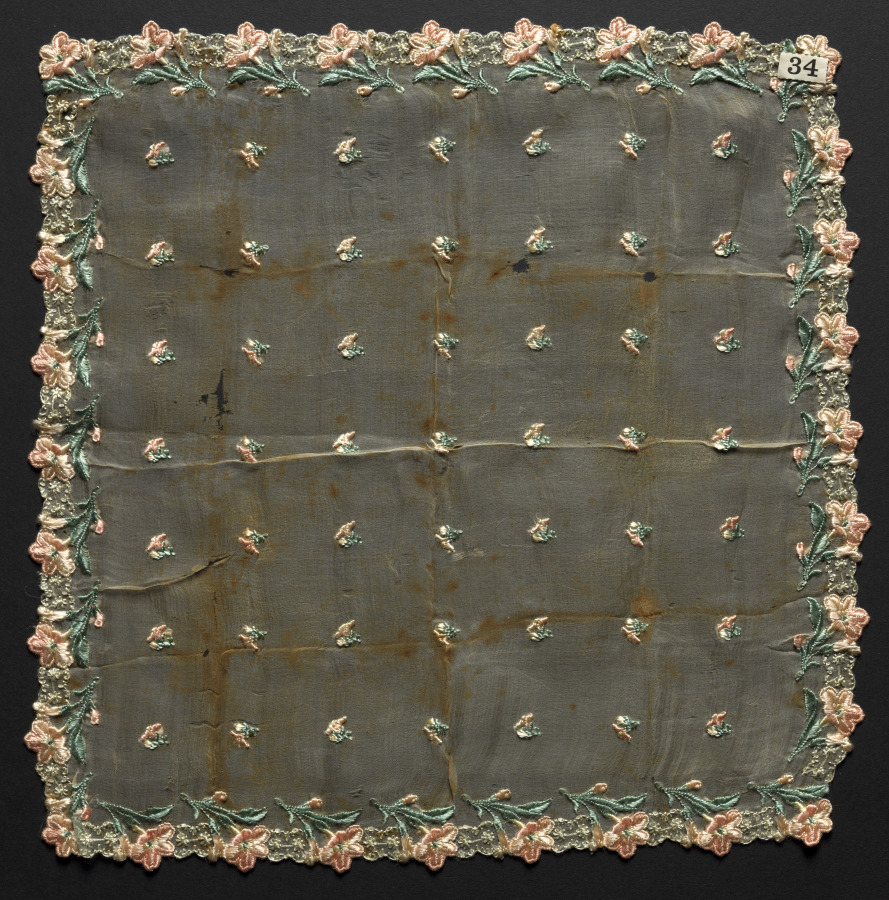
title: Lace Handkerchief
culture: Cuba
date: 1889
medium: Plain weave piña, silk embroidery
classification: Embroidery